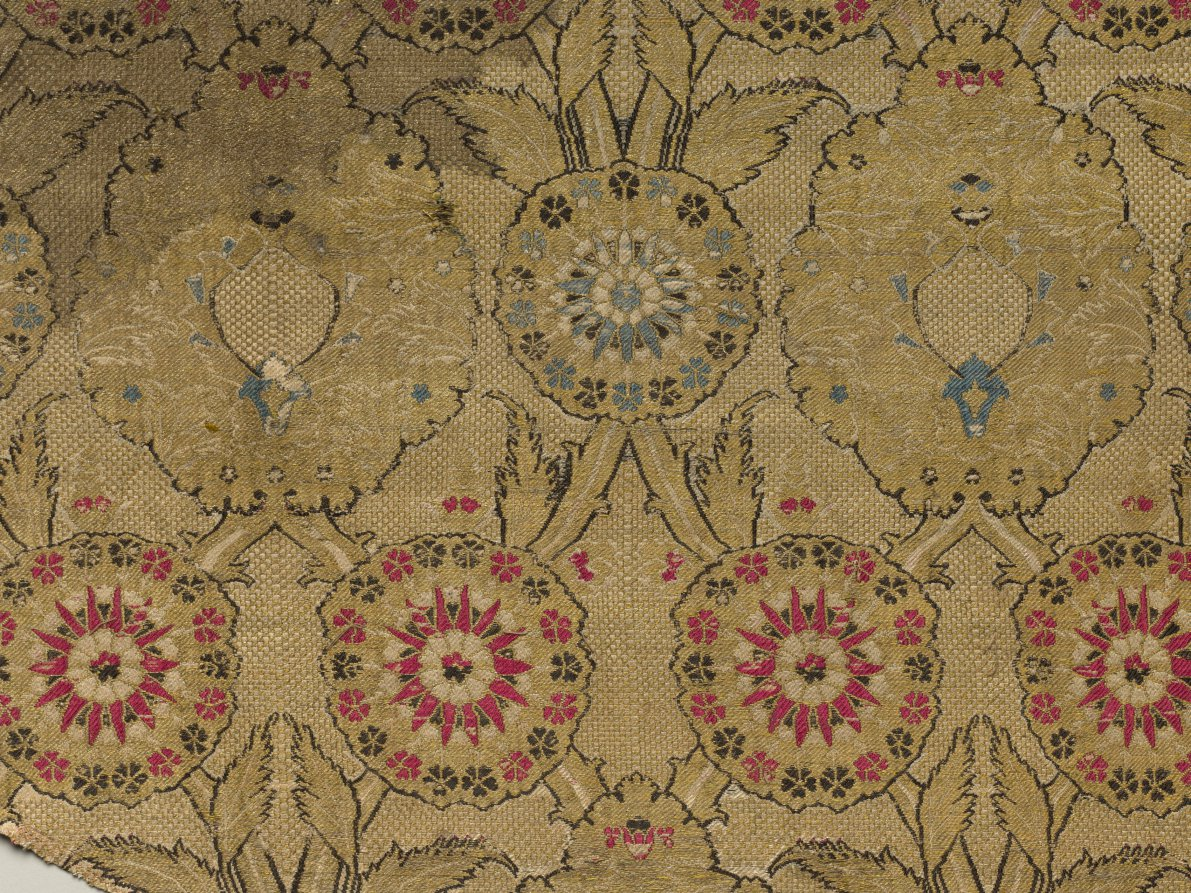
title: Lampas with double ogival floral pattern on checkered ground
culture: Turkey, Istanbul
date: 1550–1575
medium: lampas: silk and gilt-metal thread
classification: Textile